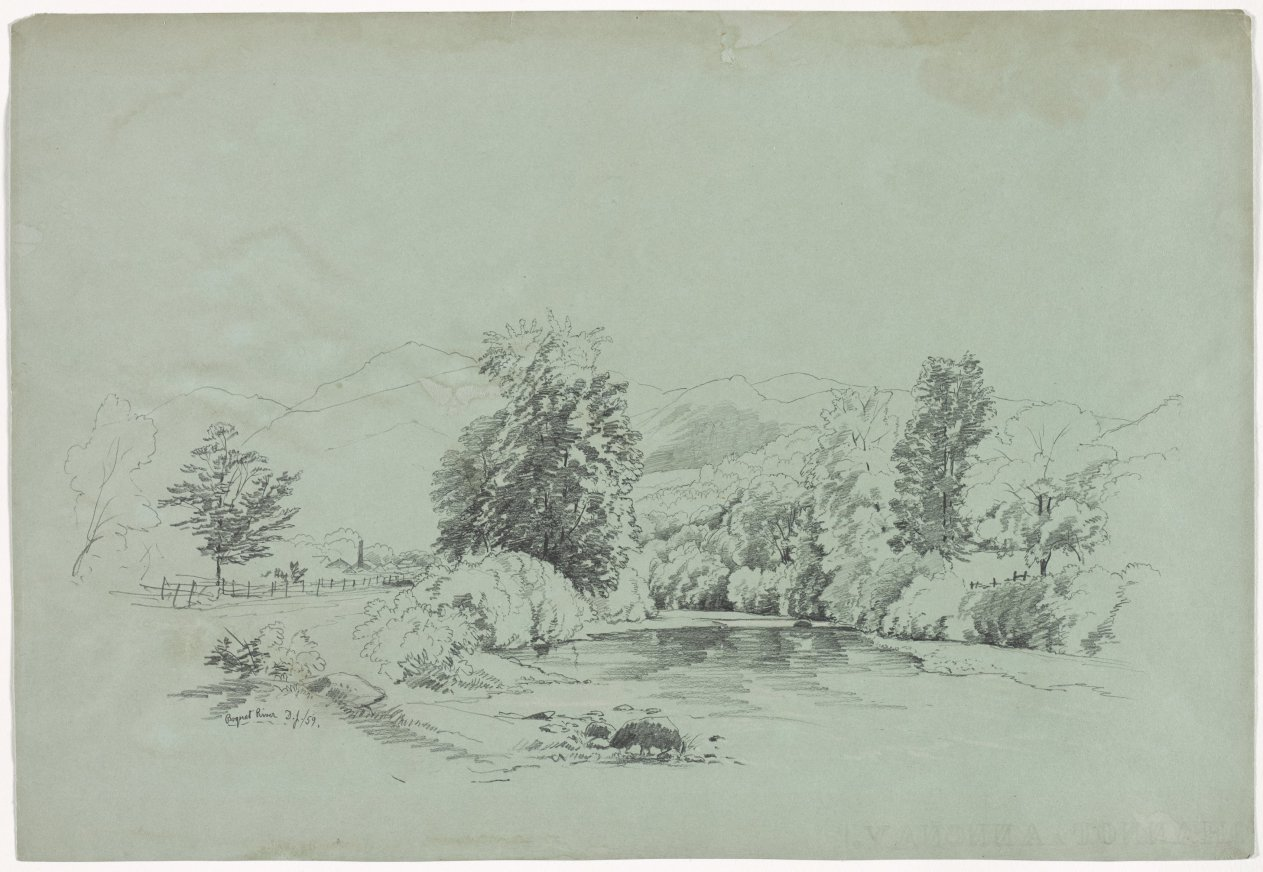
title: Boquet River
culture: America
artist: David Johnson (American, 1827–1908)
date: 1859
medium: Graphite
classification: Drawing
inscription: by artist, in graphite, ll: Bouquet River [underlined] D. J./59. ; verso, by unknown hand, in graphite, ul: 300 ; ur: 350. ; lr: 17022 / 22